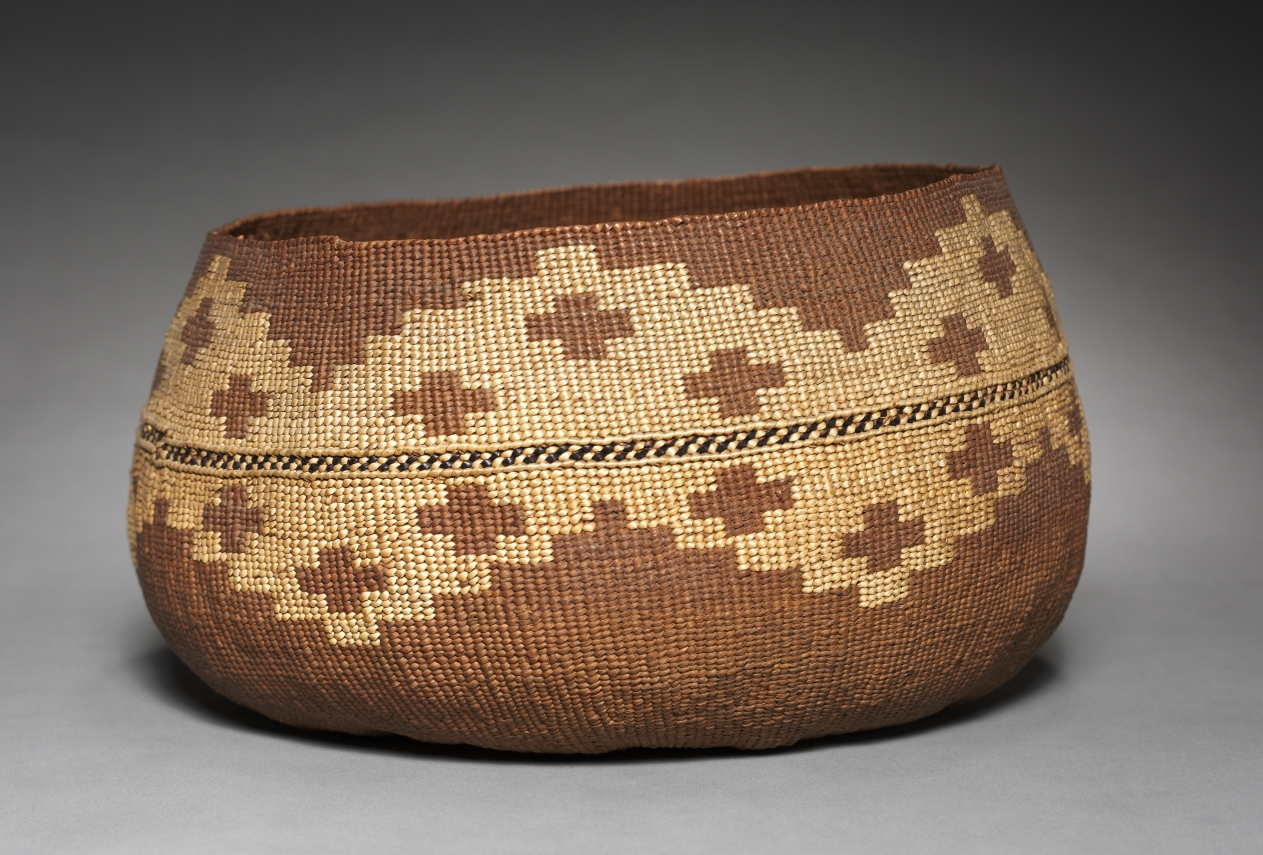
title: Cooking Bowl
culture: California, Karok or Hupa, Unassigned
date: Unassigned, before 1942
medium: twined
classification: Basketry